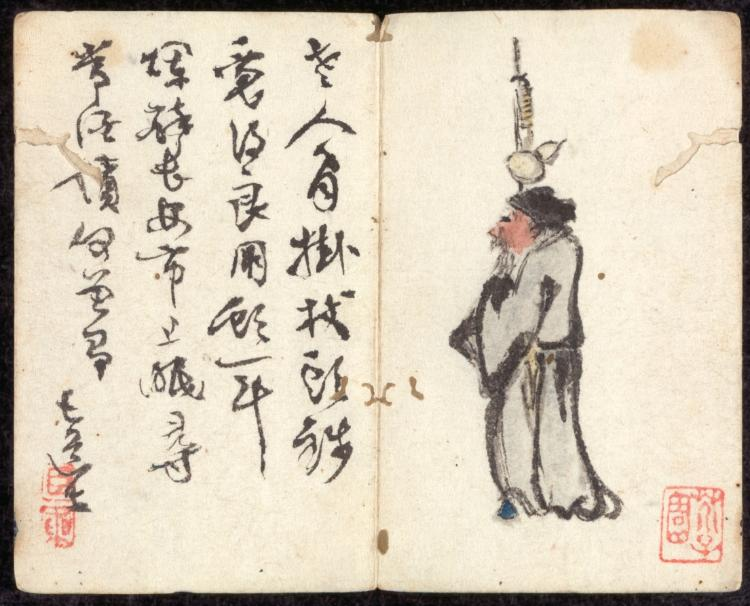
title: Miniature Album with Figures and Landscape (Man with Staff)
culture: China, Qing dynasty (1644–1911), Qianlong reign (1736–95)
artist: Zeng Yandong (Chinese, c. 1751–1827)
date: 1822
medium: album leaf, ink and color on paper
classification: Painting